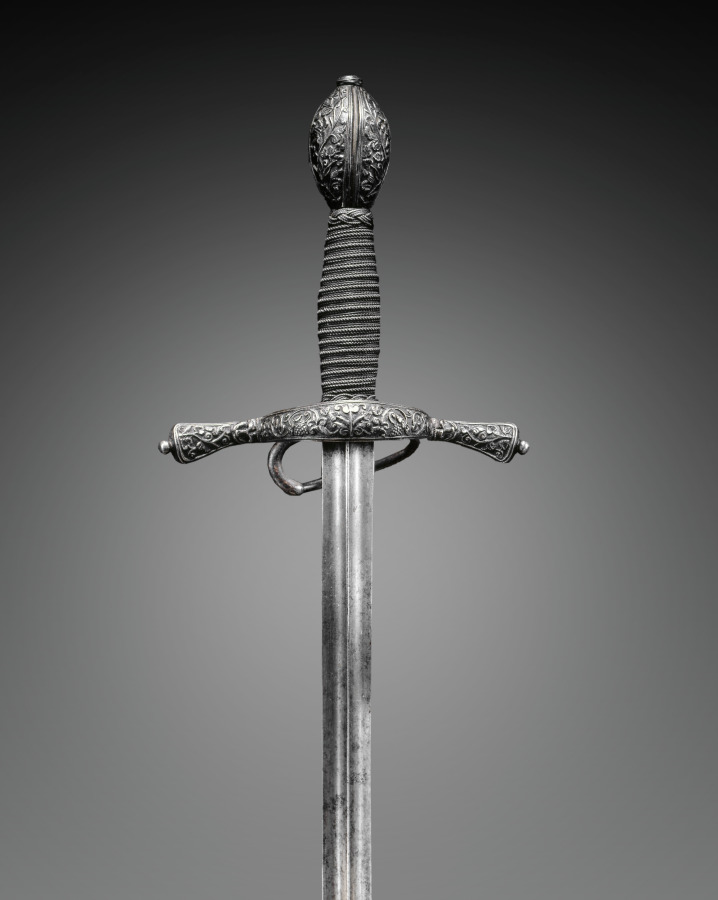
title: Rapier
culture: Italy, early 17th Century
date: c. 1600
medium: steel, wire grip; hilt blued and chiseled with foliate pattern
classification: Arms and Armor